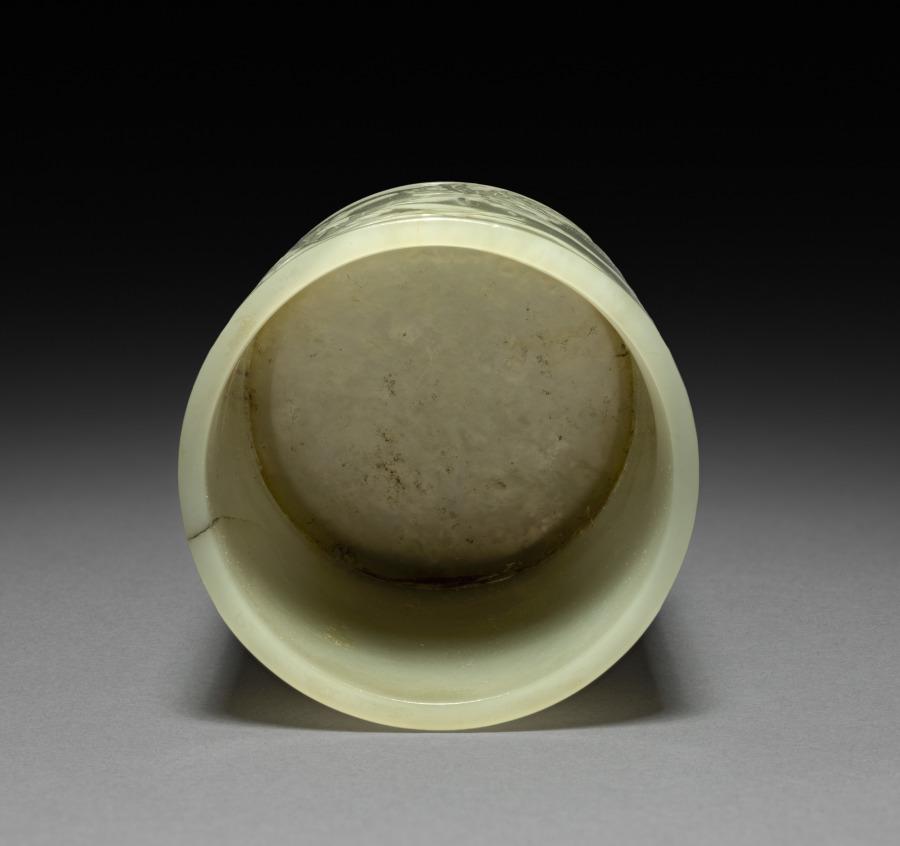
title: Cylindrical Container with Mallows and Inscription in Relief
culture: China, Qing dynasty (1644–1911), Qianlong reign (1736–95)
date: 1736–95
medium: white jade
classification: Jade